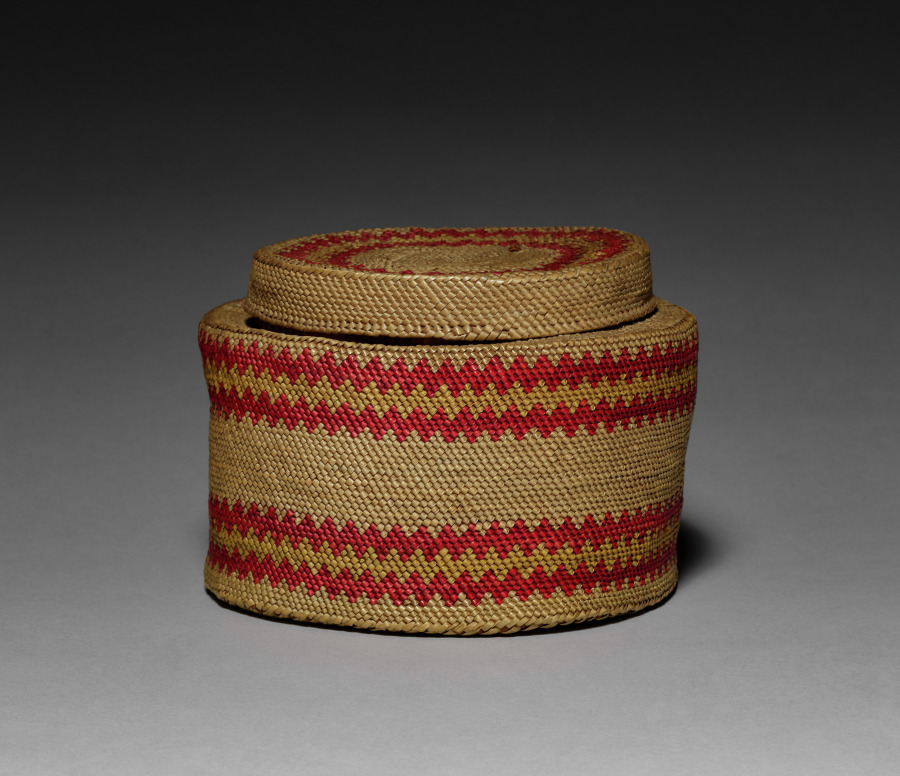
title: Ginger Jar- Shaped Basket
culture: Northwest Coast, Cape Flattery, Washington, Makah, late 19th-early 20th century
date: c 1900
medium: pear grass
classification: Basketry